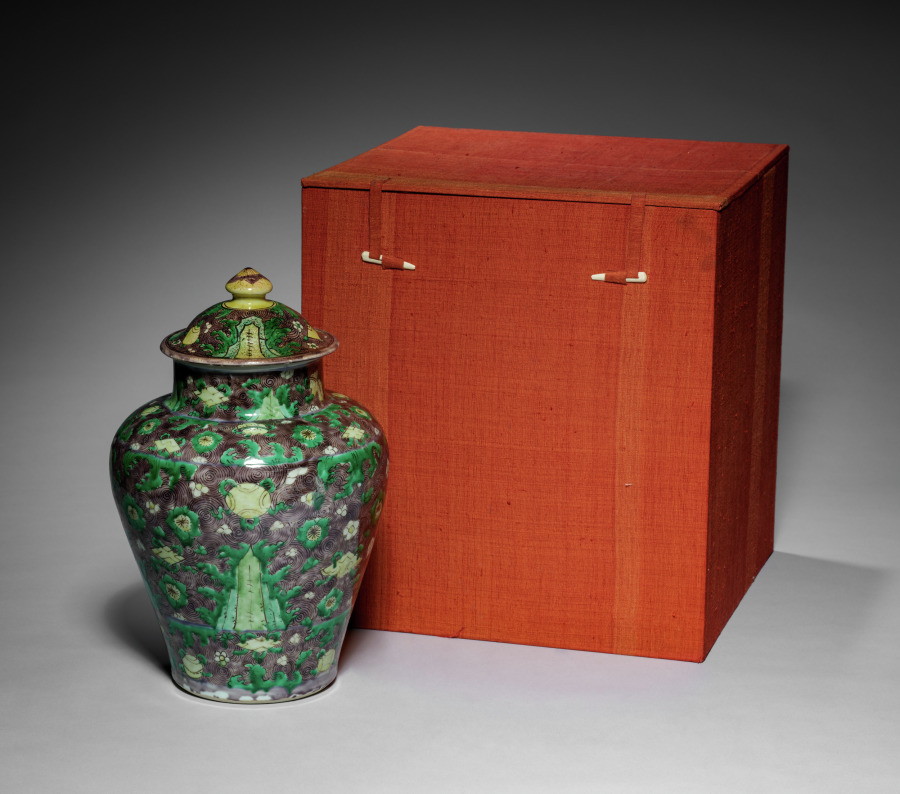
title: Baluster Jar and Cover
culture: China, Jiangxi province, Jingdezhen kilns, Ming dynasty (1368–1644) or Qing dynasty (1644–1911)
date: 1600–1650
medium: Porcelain with wucai (five-color) enamels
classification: Ceramic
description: The central motif on this jar is a mountain emerging from the sea, symbolizing Mount Sumeru in Buddhist cosmology, and representing the central axis in the universe in Daoism. White cherry blossoms floating on the wavy ground are surrounded by auspicious symbols such as the coin for wealth and the lozenge for victory. The yellow knob on the jar’s cover depicts a cherry blossom. Other fortuitous motifs—such as the leaf of protection, the pearl to grant wishes, the stone chime for celebration, rocks symbolizing longevity—also decorate the lid. While most jars have lost their covers over time, this jar retains its original lid.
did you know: The waves are depicted in a rich aubergine, or purple, glaze.